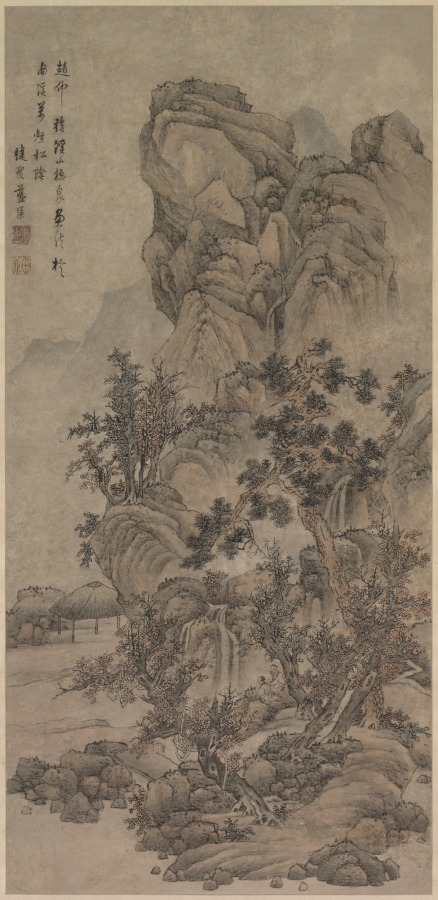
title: Landscape with Figures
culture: China, Qing dynasty (1644-1911)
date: 1644–1911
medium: hanging scroll, ink and slight color on paper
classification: Painting